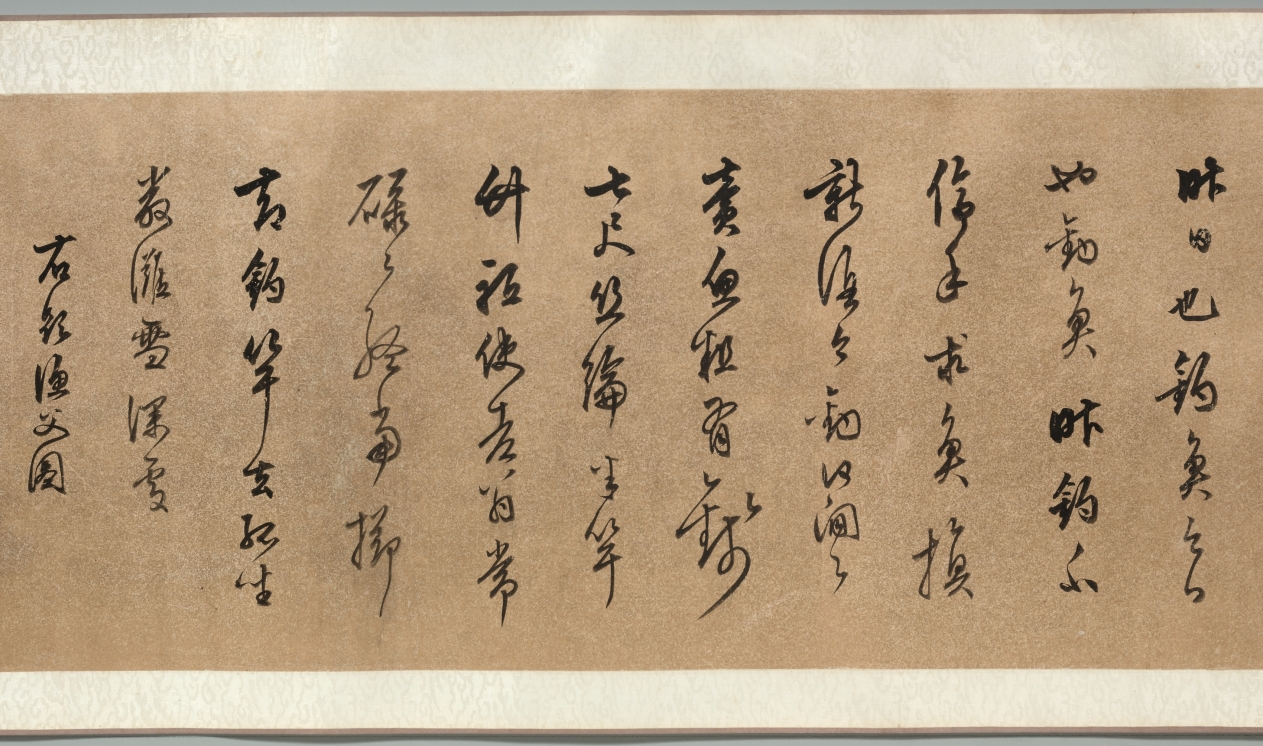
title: Four Poems: Calligraphy in Cursive Script (xingshu)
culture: China, Ming dynasty (1368–1644)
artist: Chen Jiru (Chinese, 1558–1639)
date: 1500s-1600s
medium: handscroll; ink on gold speckled paper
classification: Calligraphy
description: Written in graceful calligraphy with well-composed characters, the artist communicates his thoughts and state of mind in four poems. Characters written in dark, thick strokes convey rhythm, and indicate the moment after the writer had paused to recharge his brush with ink. Chen Jiru was a native of Huating (modern Shanghai). His calligraphy style resembles that of his friend, influential calligrapher Dong Qichang (1555–1636). Unlike Dong, Chen did not pursue government service: he burned his Confucian robes, declined a summons to serve at court, and immersed himself in literature, calligraphy, and painting.